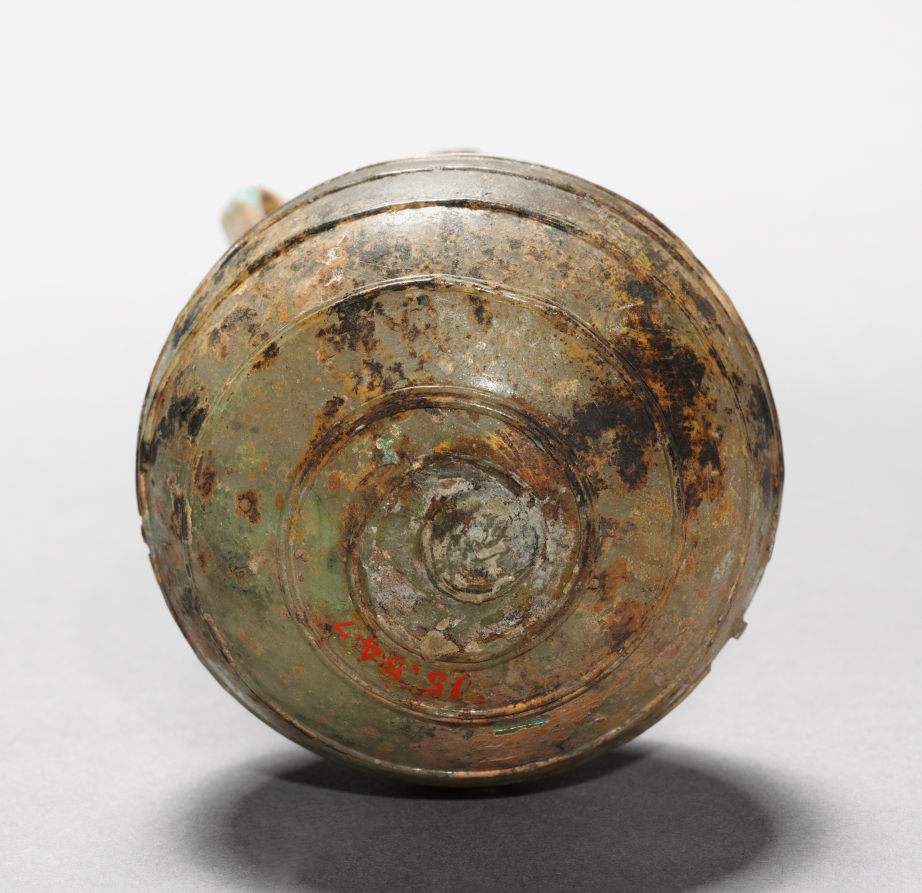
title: Pitcher with Handle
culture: Roman, Eastern Mediterranean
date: 100–400 CE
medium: glass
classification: Glass